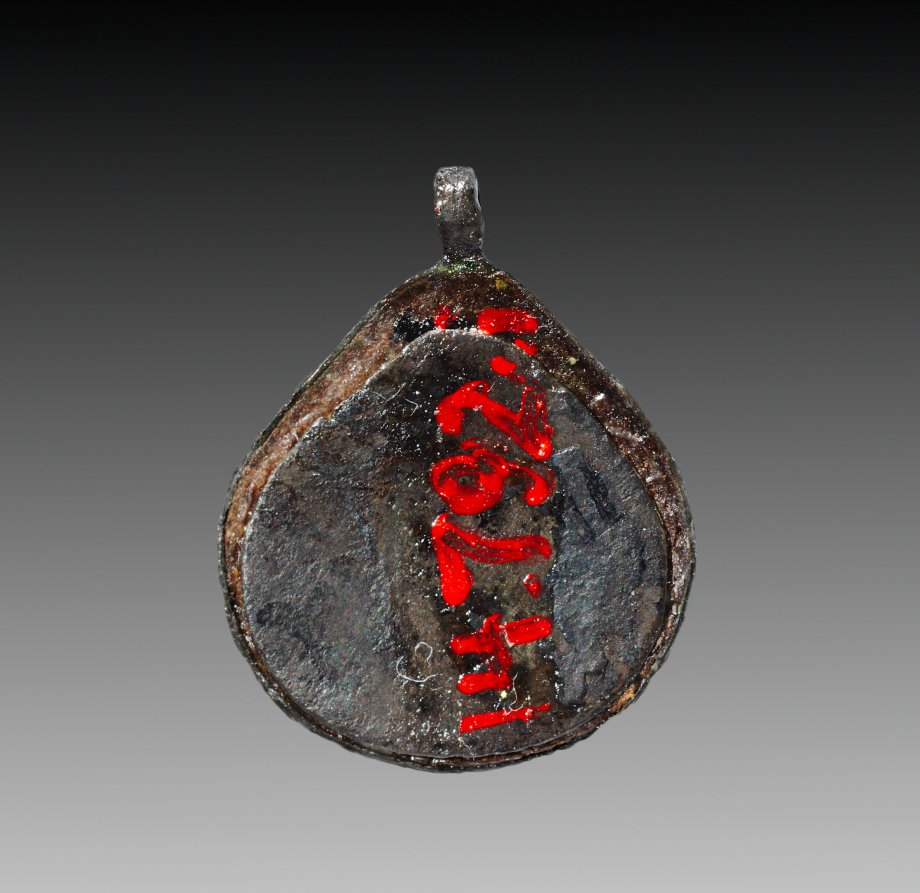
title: Oyster-Shell Pendant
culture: Egypt, Middle Kingdom (2040–1648 BCE), Dynasty 12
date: 1980–1801 BCE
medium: carnelian and silver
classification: Jewelry